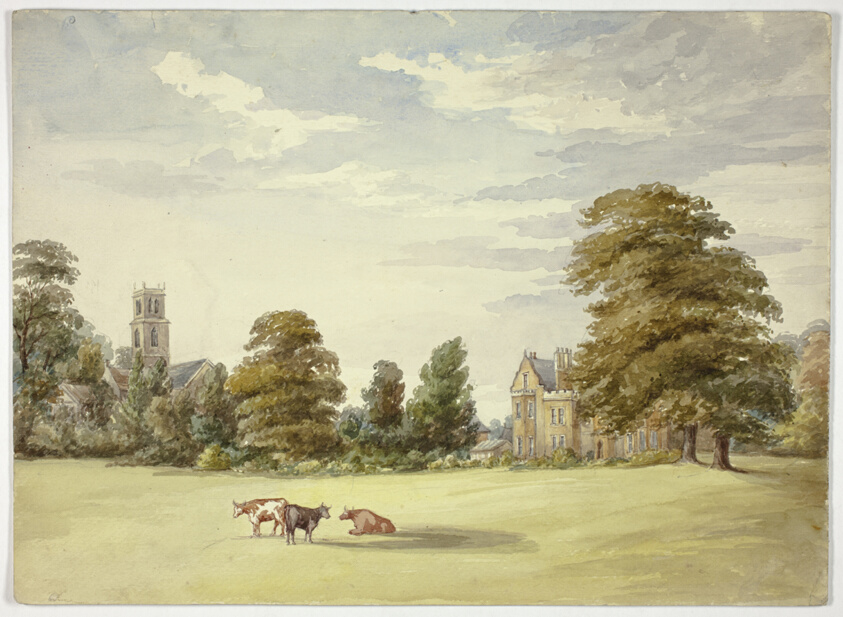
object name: Drawing and Watercolor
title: Cows before Manor House and Church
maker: Elizabeth Murray (English, c. 1815-1882)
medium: Watercolor over graphite on cream wove paper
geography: England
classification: watercolor; drawings (visual works); prints and drawing